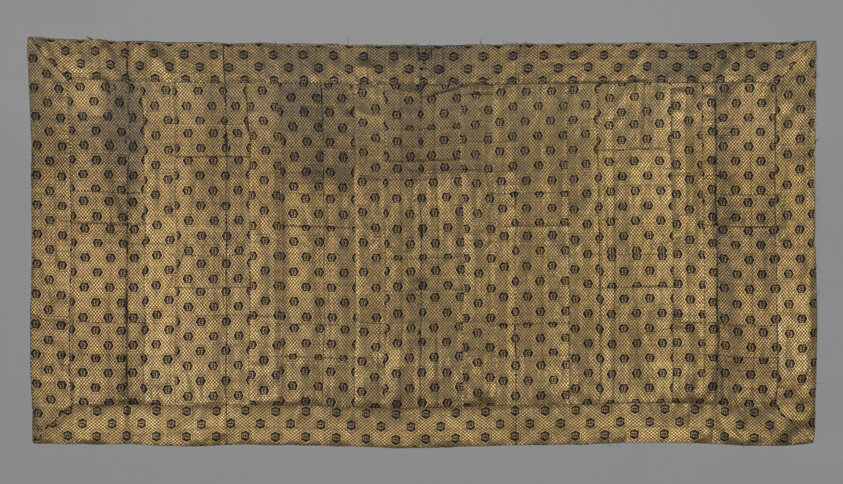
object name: Textile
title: Kesa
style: late edo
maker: Japan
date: late Edo period (1789–1868), 1801/44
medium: Silk and gold-leaf-over-lacquered-paper strip, warp-float faced 2:1 ‘Z’ twill weave with weft-float faced 1:2 ‘Z' twill interlacings of secondary binding warps and supplementary patterning wefts; lined with silk, plain weave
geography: Japan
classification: textile; liturgical - buddhist; weaving